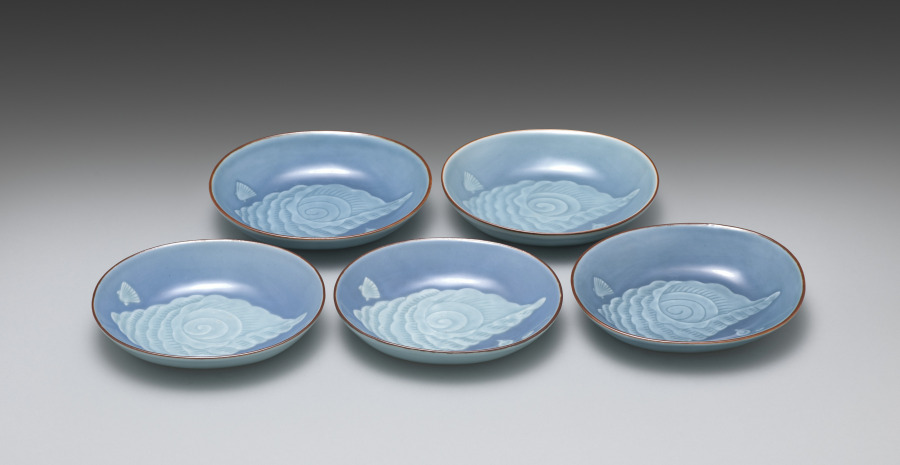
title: Dishes with Shells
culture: Japan, Taishō period (1912–26)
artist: Seifū Yohei IV (Japanese, 1872–1951)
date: 1914–46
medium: Set of five dishes; porcelain with blue glaze, iron oxide, and molded design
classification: Ceramic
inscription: 清風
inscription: 清風造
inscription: 清風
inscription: 成山清風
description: Yohei IV chose an aquatic theme for this set of five mukōzuke, side dishes. He added an iron oxide rim and used a concentrated blue glaze on both the interior and exterior. The glaze, named on the box lid, is his father’s “evening moon” (tsukiyoi) color. The conch in relief takes up the entire bottom of the dish. Up the sides are two snails on one end and on the other a scallop. This results in a boldly graphic, less realistic effect.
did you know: This set of dishes, mukōzuke, could be used for serving small side dishes at a tea gathering.